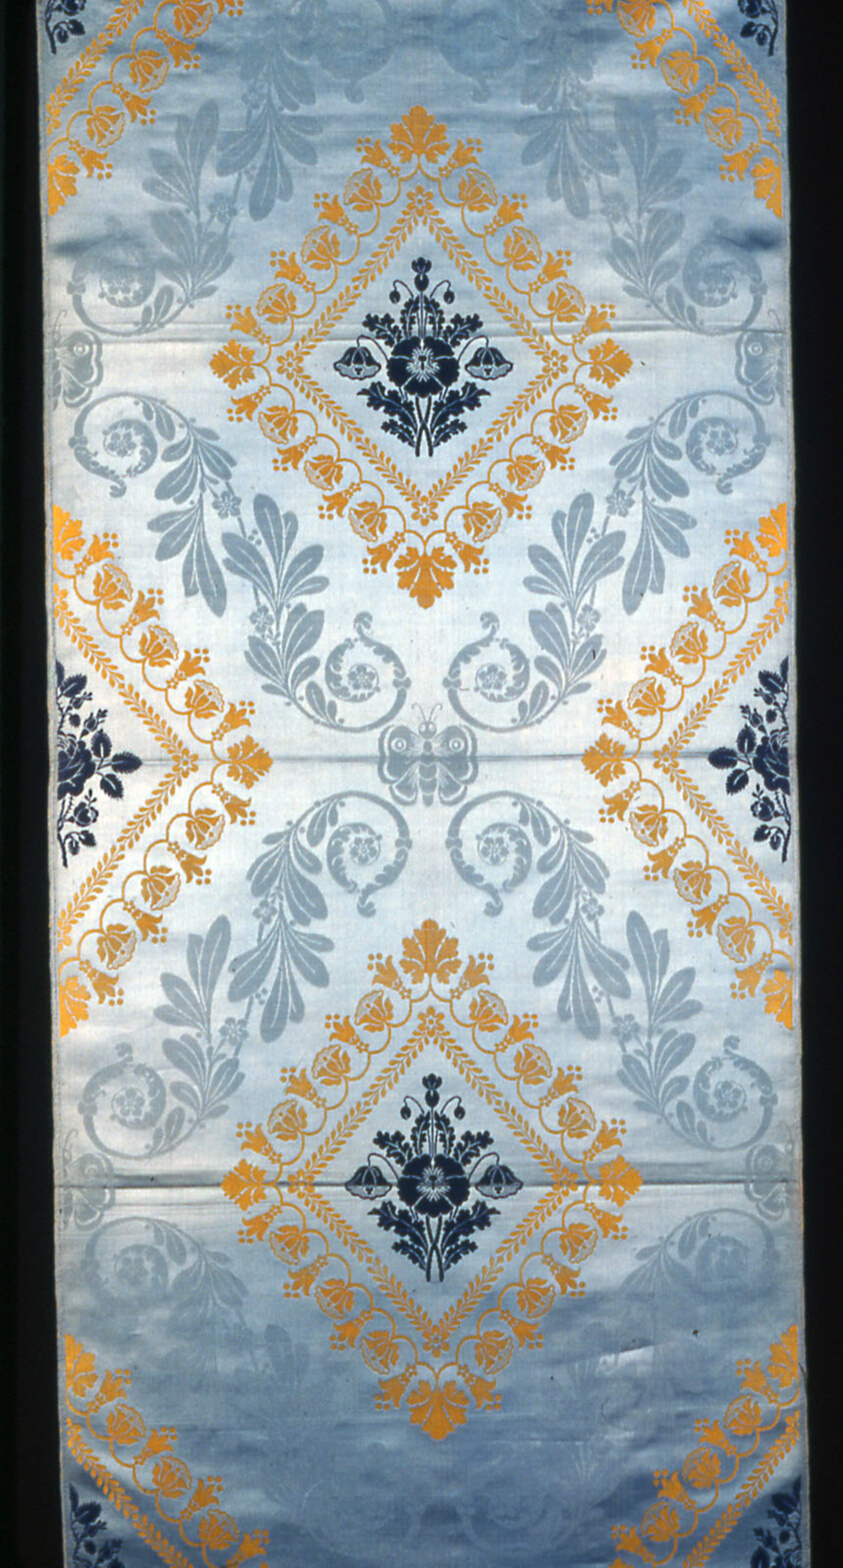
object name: Textile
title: Panel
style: empire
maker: France, Lyon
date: 1805/10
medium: Silk, warp-float faced 7:1 satin weave with plain and twill interlacings of secondary binding warps, patterning and brocading wefts and self-patterned by areas of plain weave;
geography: Lyon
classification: textile; weaving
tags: medallions